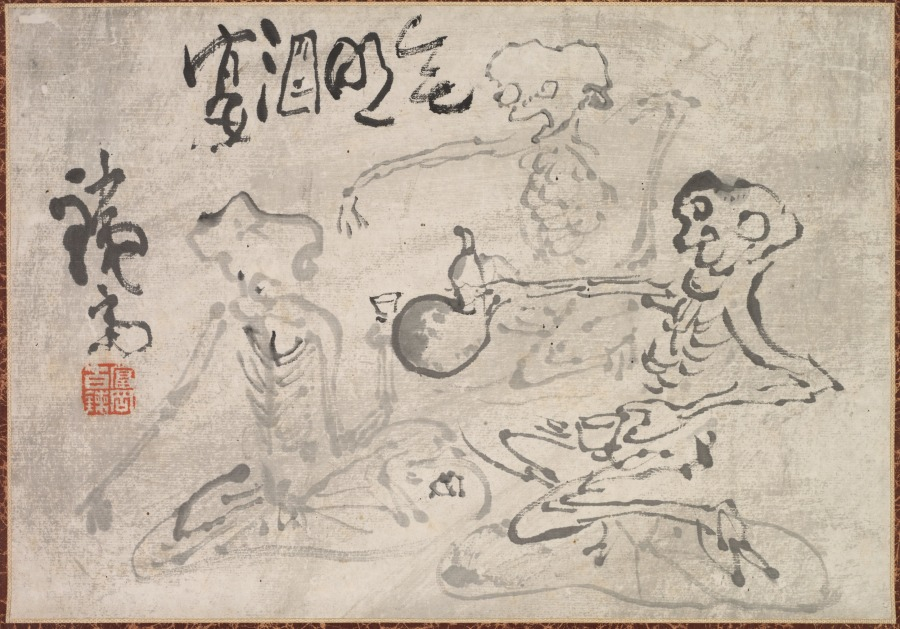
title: Sake Party with No Light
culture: Japan, Meiji period (1868–1912) to Taishō period (1912–26)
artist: Tomioka Tessai (Japanese, 1836–1924)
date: late 1800s–early 1900s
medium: hanging scroll; ink on paper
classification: Painting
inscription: Artist's signature and seal at left side; title at top left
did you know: Three skeletons are holding cups and passing around a bottle of sake.